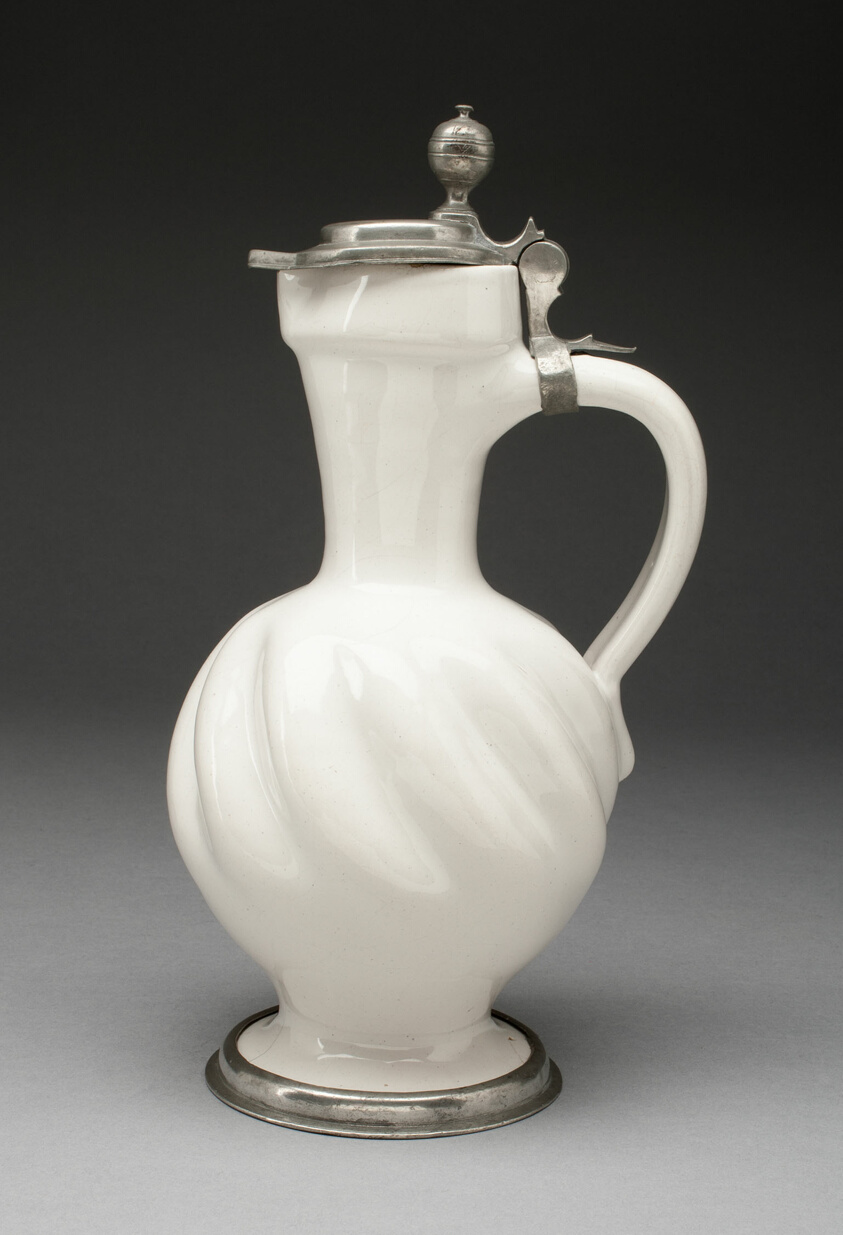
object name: Ceramics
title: Jug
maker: Germany, Hanau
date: c. 1700/05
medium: Tin-glazed earthenware (faience) and pewter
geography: Hanau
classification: ceramics; european decorative arts